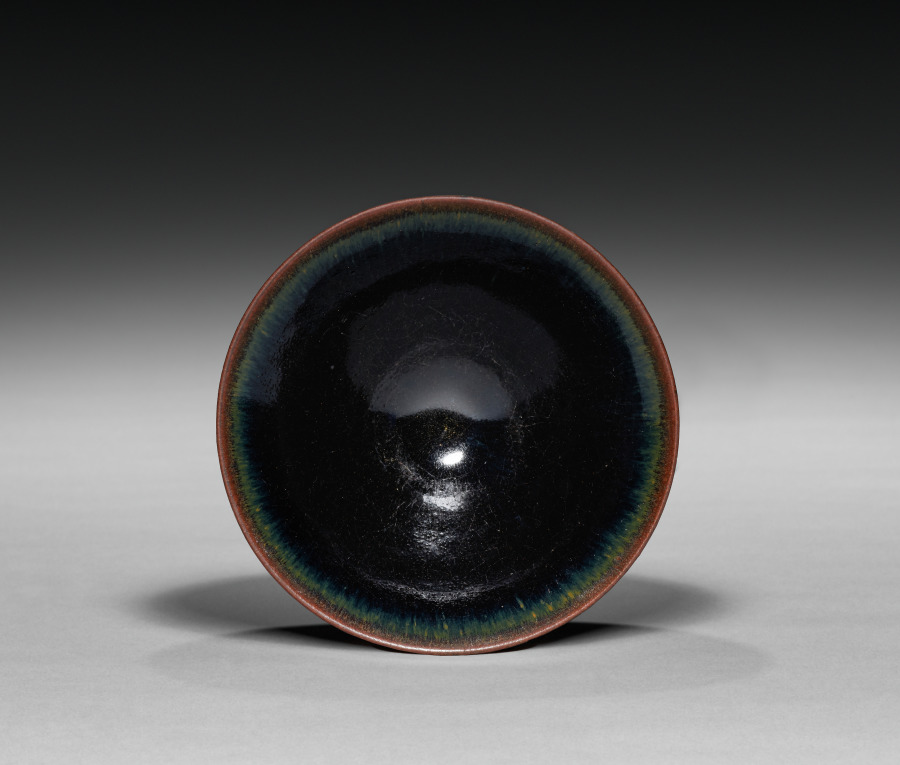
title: Black Glazed Teabowl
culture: China, Fujian province, Southern Song dynasty (1127-1279)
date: 1100s–1200s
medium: Stoneware with opaque dark brown glaze, Jian ware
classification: Ceramic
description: This teabowl exhibits a shiny almost mirror-black, thick glaze that runs down from the mouth showing fine, bluish-brown streaks around the rim. The Northern Song dynasty emperor Huizong (徽宗, reigned 1100–1126) once referred to the markings as “hare’s fur.” The emperor also remarked that Jian bowls should be deep and wide to allow tea powder to be whisked sufficiently in the bowl. The contrast between the tea’s white foam and the dark glaze was appreciated by connoisseurs. The thick walls and conical shape of the bowls were ideal for keeping tea hot and frothy.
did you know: Jian ware was made in Fujian province, first in kilns at Jian’an and later at Jianyang.